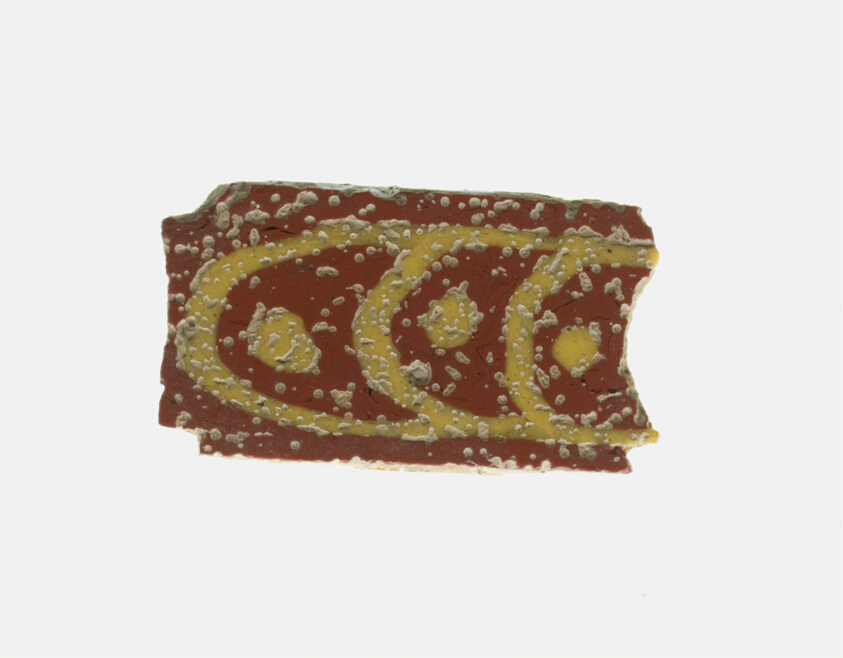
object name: Decorative Arts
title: Fragment of an Inlay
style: roman (ancient, style or period), ancient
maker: Roman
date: 1st century BCE–1st century CE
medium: Glass, mosaic glass technique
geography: Roman Empire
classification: fragment; decorative arts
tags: decoration